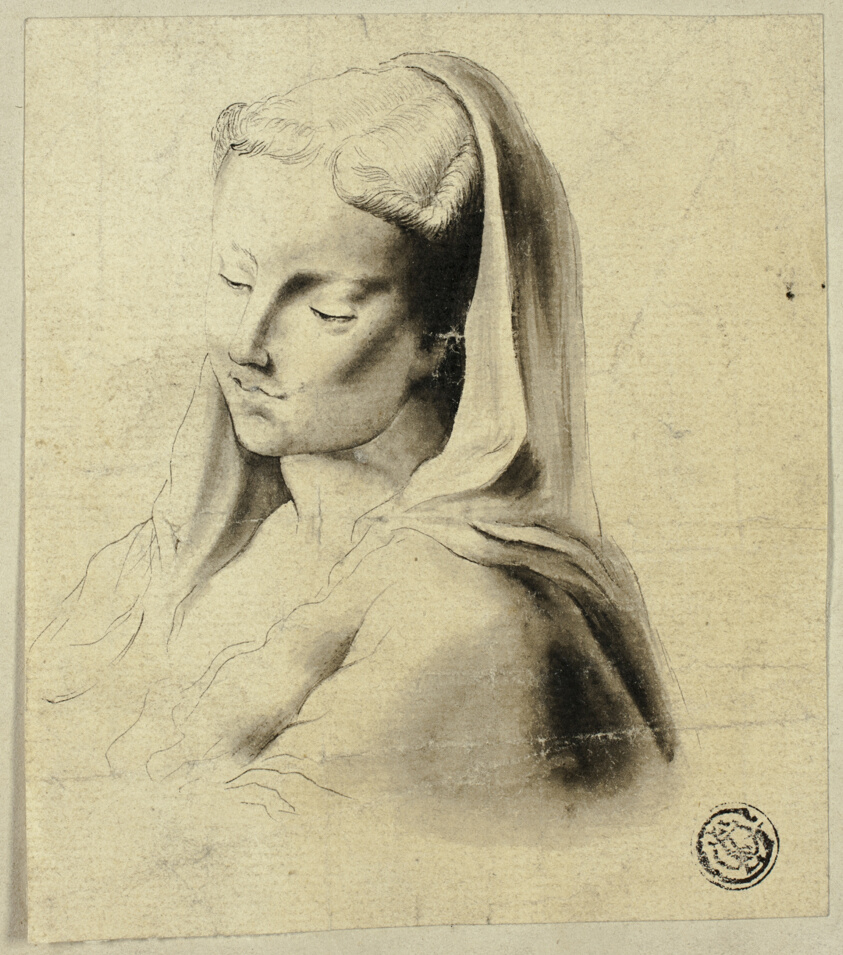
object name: Drawing and Watercolor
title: Bust of a Woman with Veil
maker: Unknown Artist; Italian, 18th century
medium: Pen and black ink, with brush and gray wash, on cream laid paper, laid down on gray wove paper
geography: Italy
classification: pen and ink drawings; drawings (visual works); prints and drawing